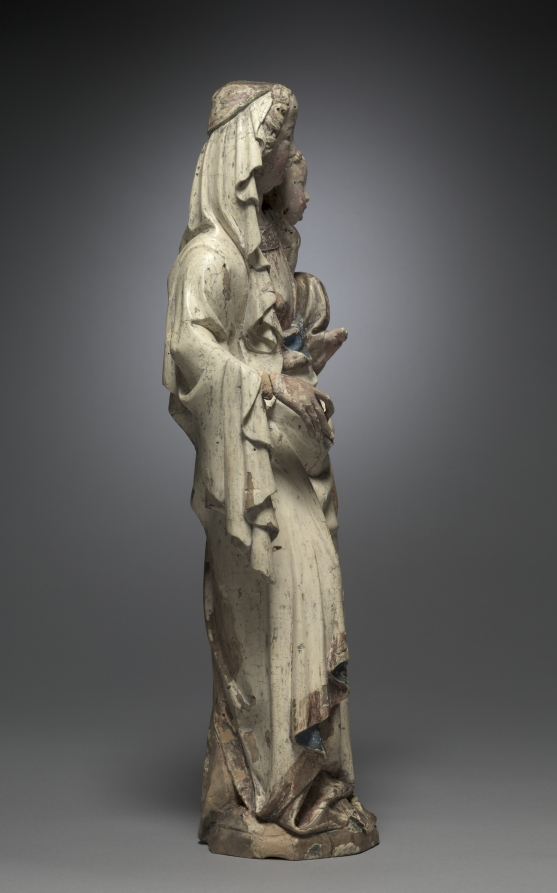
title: Virgin and Child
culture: Austria, Diocese of Passau, 14th century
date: c. 1370–1380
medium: painted lindenwood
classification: Sculpture